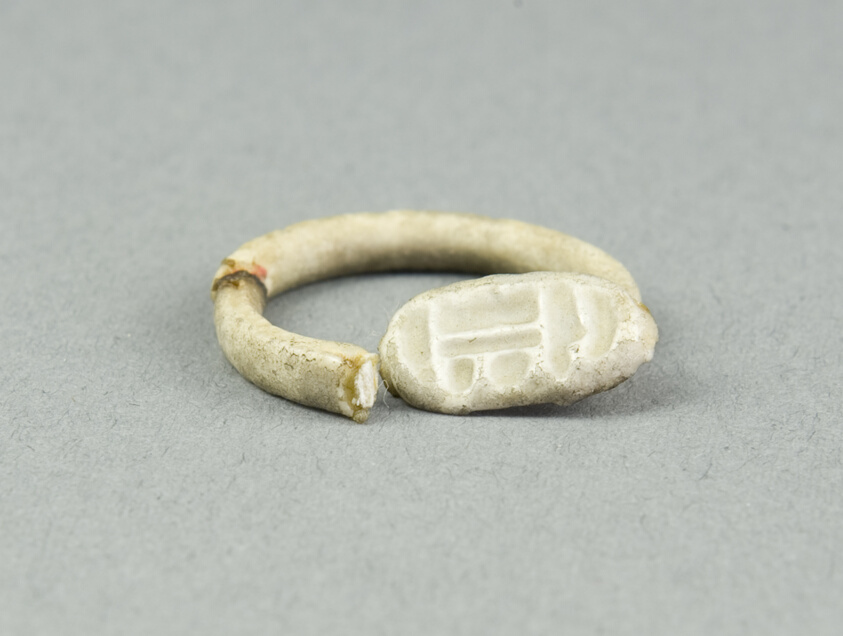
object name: Costume and Accessories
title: Ring: Amun-Ra, flanked by nb signs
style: egyptian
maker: Egyptian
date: New Kingdom, Dynasties 18–20 (about 1550–1069 BCE)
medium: Faience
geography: Egypt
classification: ring (jewelry); ceramics; jewelry; ancient art; costume; faïence (composite material)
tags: gods (deities)